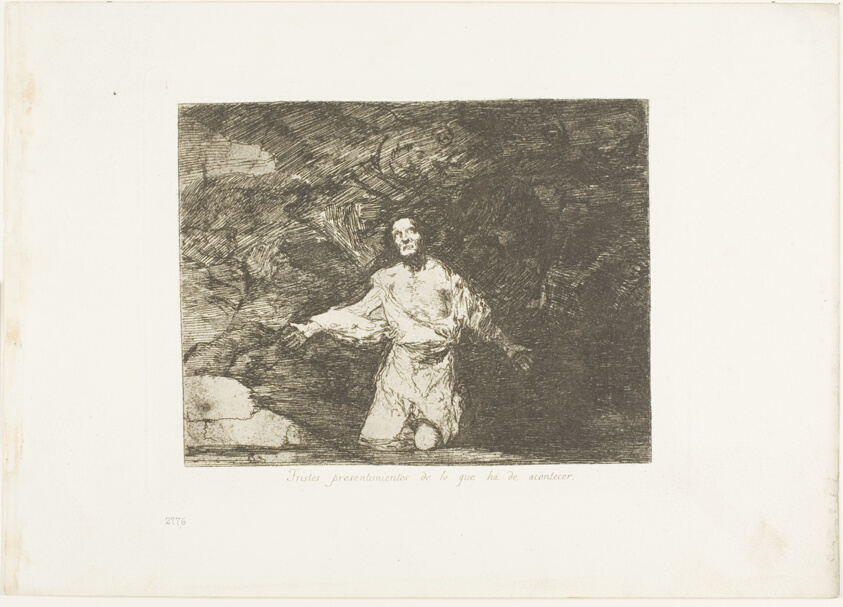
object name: Print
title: Sad Forebodings of What is Going to Happen, plate one from The Disasters of War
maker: Francisco José de Goya y Lucientes (Spanish, 1746-1828)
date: 1814/20, published 1863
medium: Etching, burin, drypoint and burnishing on ivory wove paper with gilt edges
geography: Spain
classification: etching; print; prints and drawing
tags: war